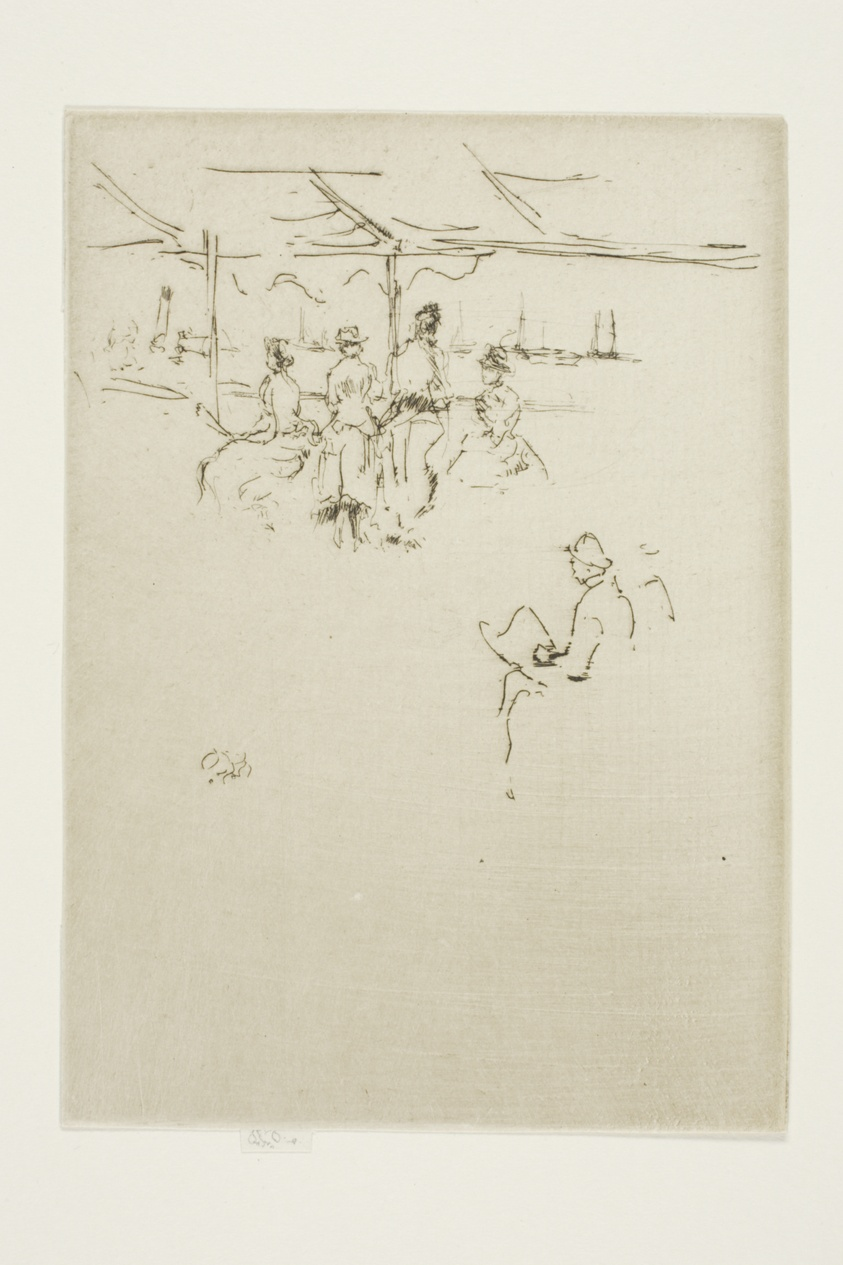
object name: Print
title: The Landing Stage, Cowes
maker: James McNeill Whistler (American, 1834-1903)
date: 1887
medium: Etching in black ink on ivory laid paper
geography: United States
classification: etching; print; prints and drawing; paper